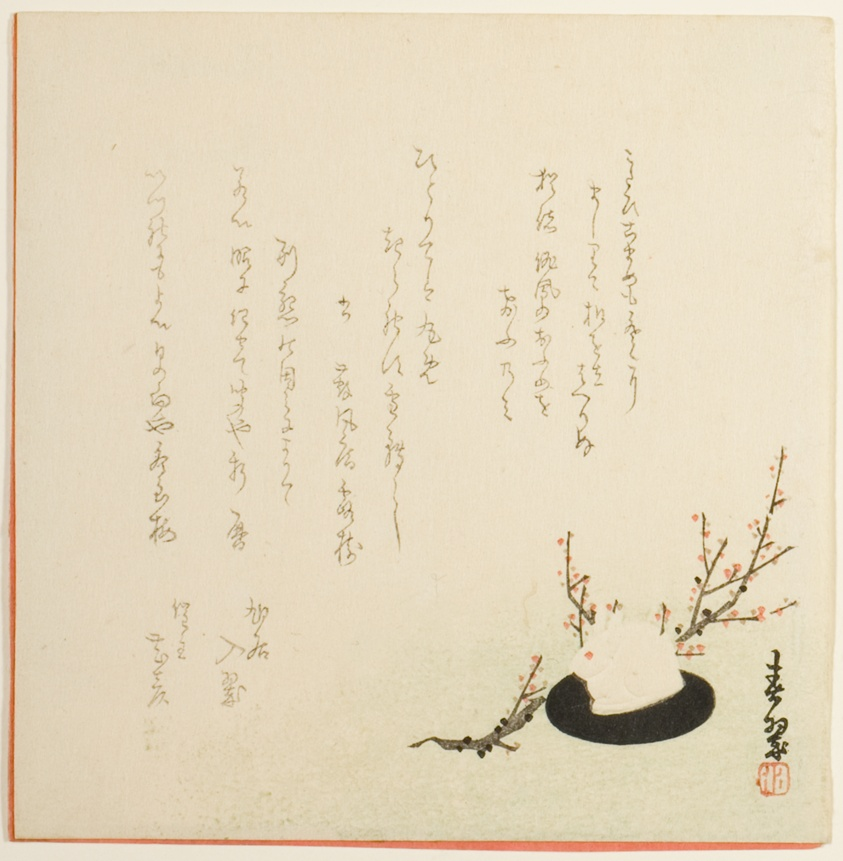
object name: Print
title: Snowy Rabbit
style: Japanese (culture or style)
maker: Yabu Chosui (Japanese, 1814-c. 1870)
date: 1867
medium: Color woodblock print; surimono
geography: Japan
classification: woodblock print; print; asian art